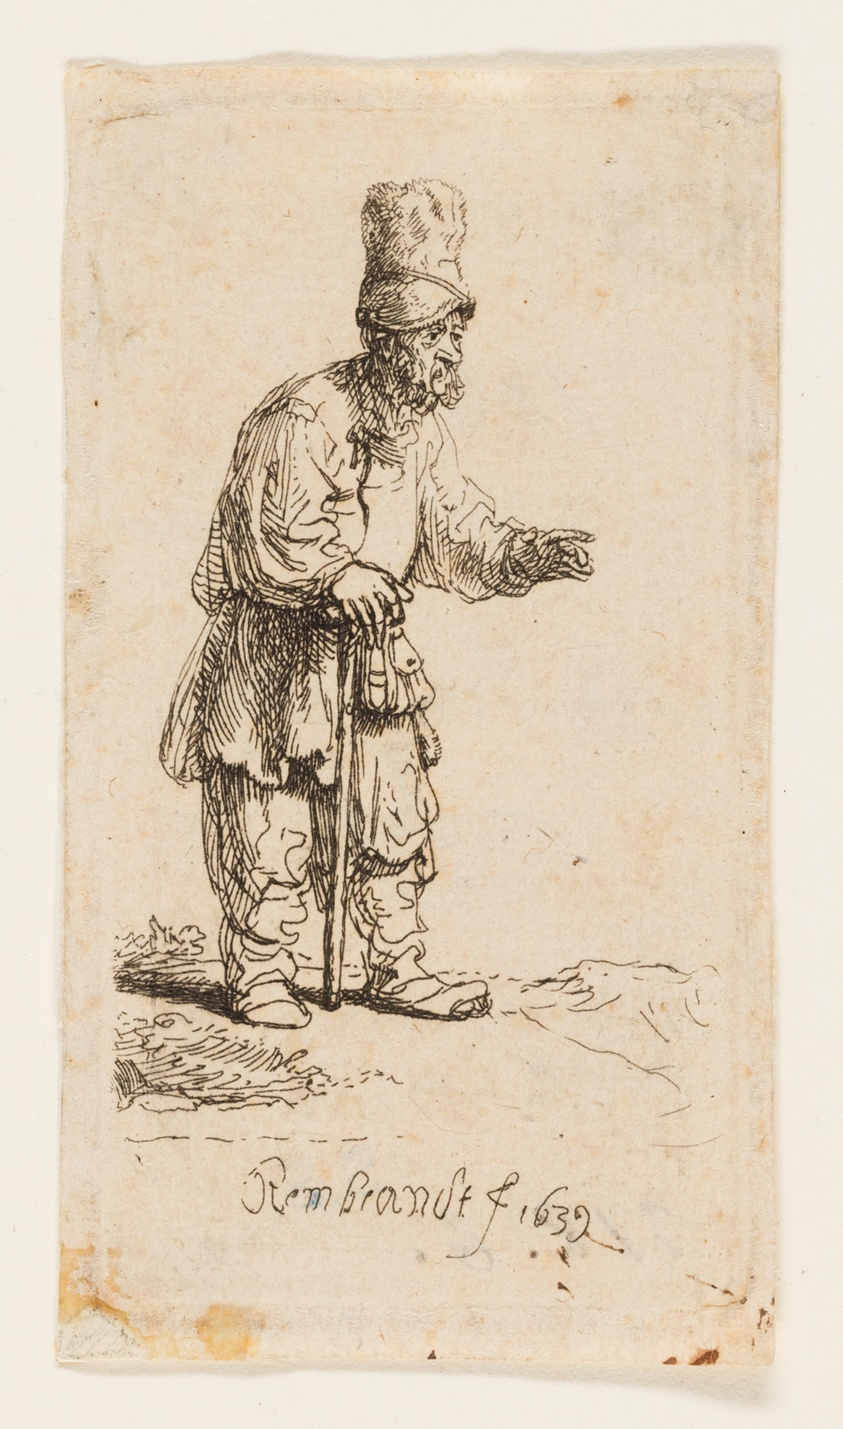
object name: Print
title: Peasant in a High Cap, Standing Leaning on a Stick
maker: Rembrandt van Rijn (Dutch, 1606-1669)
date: 1639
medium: Etching on paper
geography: Holland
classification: etching; print; prints and drawing; paper